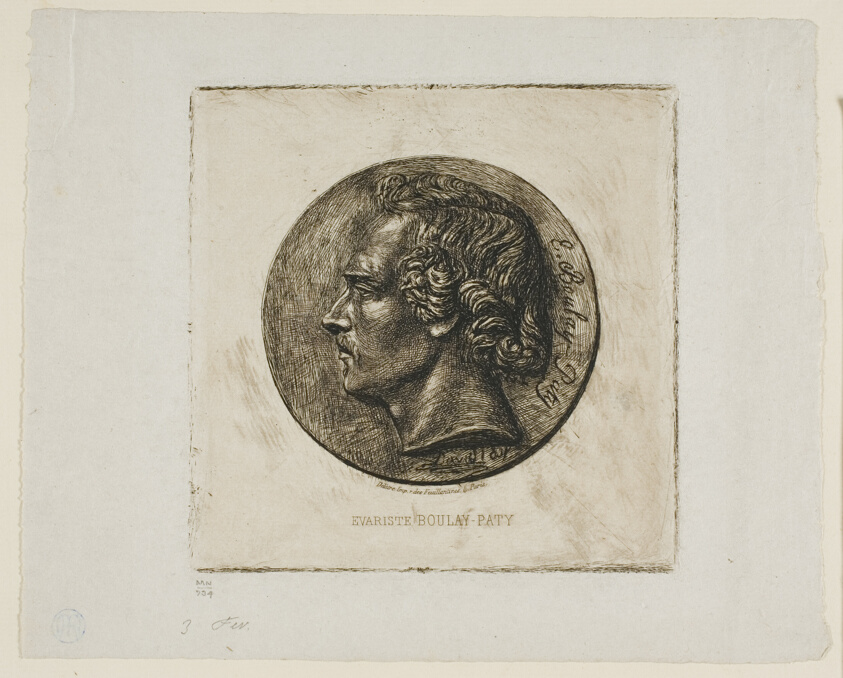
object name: Print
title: Portrait of the Poet Evariste Boulay-Paty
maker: Charles Meryon (French, 1821-1868); after Pierre Jean David d'Angers (French, 1788-1856); printed by Auguste Delâtre (French, 1822-1907)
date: 1861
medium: Etching with burnishing in warm black on grayish ivory laid chine, hinged to ivory laid paper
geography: France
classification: etching; print; prints and drawing